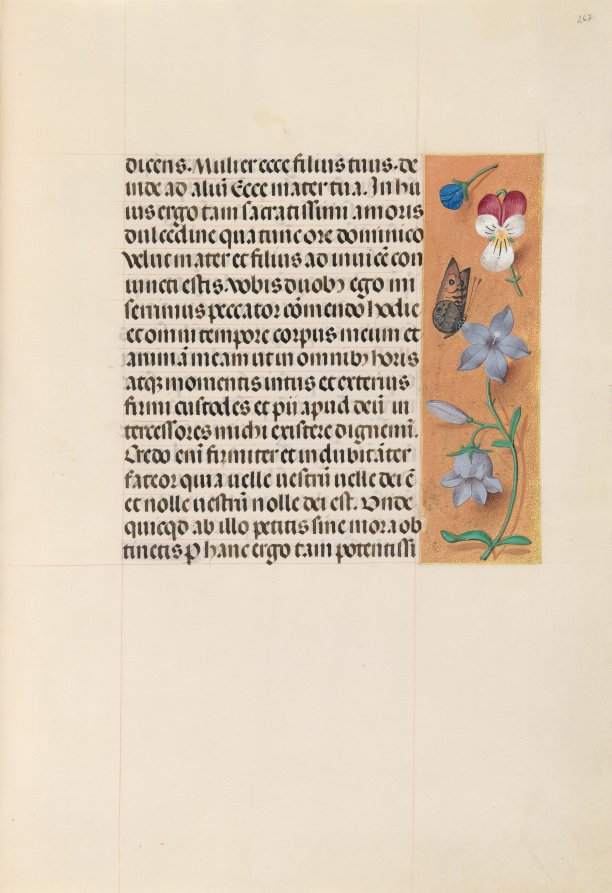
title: Hours of Queen Isabella the Catholic, Queen of Spain: Fol. 263r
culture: Flanders, Ghent and Bruges, late 15th century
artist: Master of the First Prayerbook of Maximillian (Flemish, c. 1444–1519)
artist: and Associates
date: c. 1500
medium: ink, tempera, and gold on vellum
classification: Bound Volume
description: This manuscript was illuminated by a circle of at least five highly organized manuscript painters active in the Flemish cities of Ghent and Bruges. The principal illuminator was Alexander Bening, who painted the majority of the book's miniatures. Manuscripts produced by this circle of artists are renowned for the decoration of their borders, which typically feature a rich variety of realistically-painted flowers, birds, and butterflies. This prayer book, called a book of hours, was intended not for a cleric, but for the private devotions of a lay person-in this case, Isabella the Catholic, Queen of Spain (1451-1504). Isabella's coat of arms embellishes the book's frontispiece. It is unlikely that the book was commissioned by the Queen herself; rather, she probably received it as a diplomatic gift from someone courting her patronage, perhaps Cardinal Francisco Jimenez de Cisneros. A Franciscan friar, Jimenez was dependent upon Isabella for his advancement, first to the post of Queen's confessor in 1492, and then to Archbishop of Toledo in 1495.